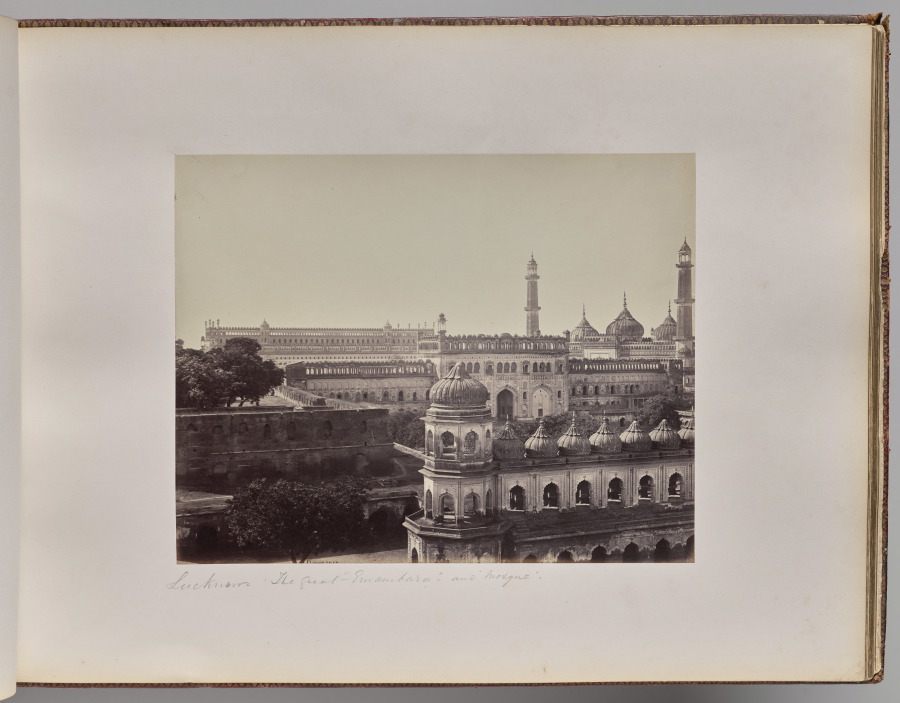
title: Lucknow. The Great Emambara and Mosque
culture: England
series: Photographs of Northern India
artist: Samuel Bourne (British, 1834–1912)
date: 1863–70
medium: albumen print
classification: Photograph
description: The 50 images in this album, all taken in the 1860s, move from the hill towns of the Himalayas down to cities including Lahore (now in Pakistan), Delhi, Lucknow, Agra, Benares (now Varansi), and Calcutta (now Kolkata). Architectural studies of major monuments offer valuable historical records of what sites such as the Taj Mahal and the imperial mosque of the Mughal emperors in Delhi looked like before twentieth-century restorations.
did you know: Samuel Bourne, the author of most the images in this album, was a banker in England before he moved to India to become a professional photographer.